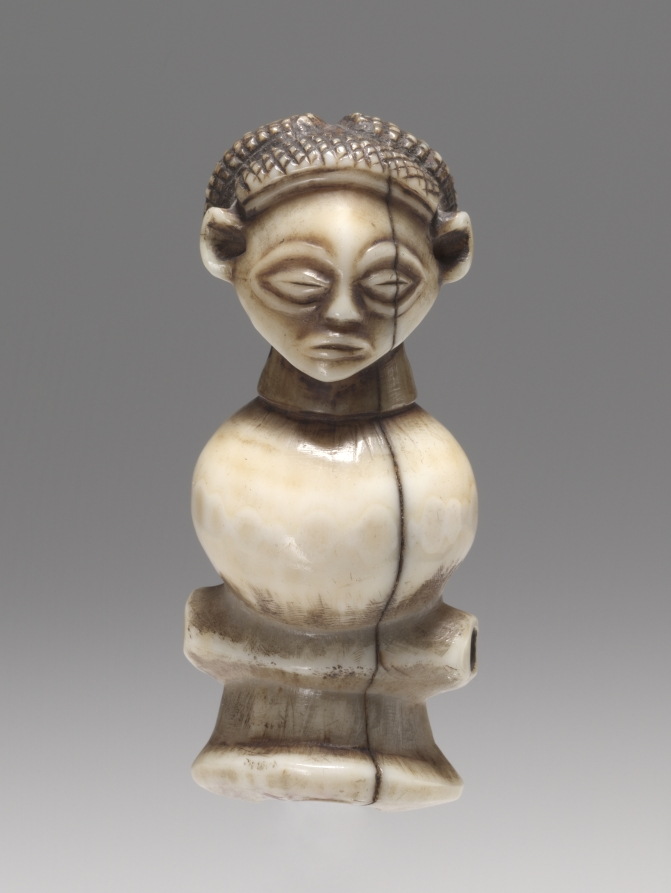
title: Whistle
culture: Central Africa, Democratic Republic of Congo or Angola, Chokwe people, late 1800s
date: late 1800s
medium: Probably hippopotamus ivory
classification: Musical Instrument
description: This was the first sculptural work from Africa to enter the CMA's collection.